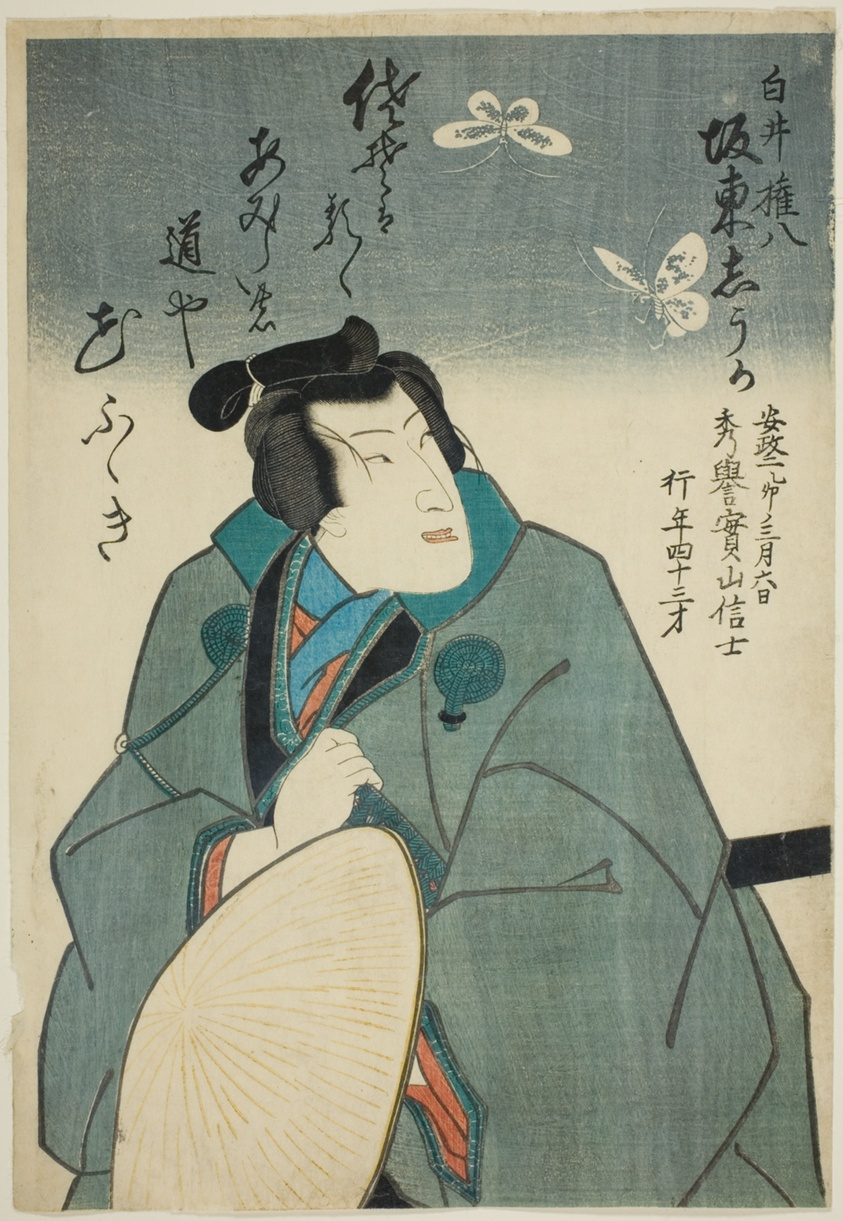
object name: Print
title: Memorial Portrait of the Actor Bando Shuka I in the Role of Shirai Gonpachi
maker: Utagawa School (Japanese, 19th century)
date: 1855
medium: Color woodblock print; oban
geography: Japan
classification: print; asian art